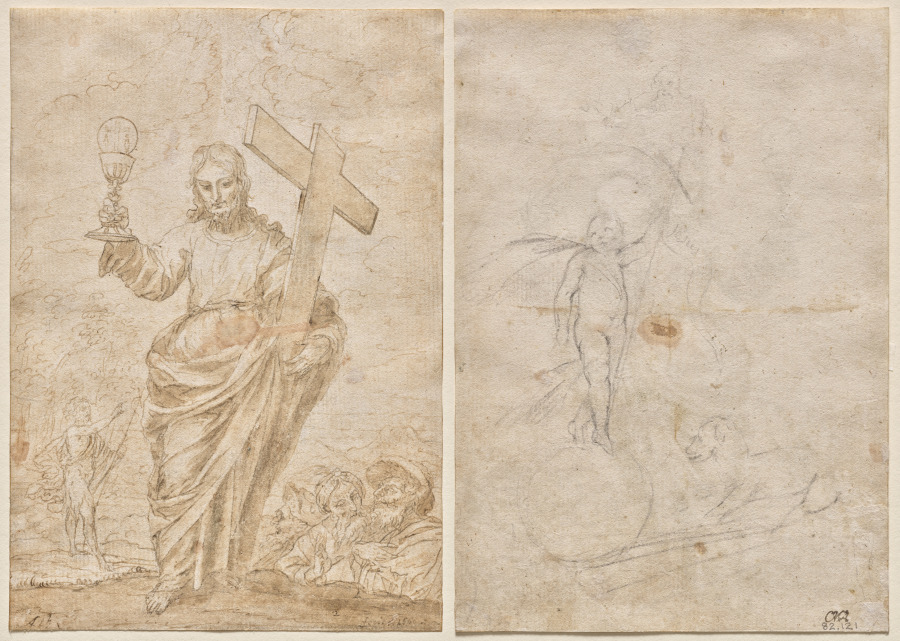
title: Christ Holding a Chalice and Cross (recto); Resurrected Christ and Lamb of God (verso)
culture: Spain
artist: Alonso Cano (Spanish, 1601–1667)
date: 1666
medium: pen and brown ink and brush and brown wash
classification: Drawing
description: In this drawing, a triumphant Christ holds the cross signifying his resurrection while offering a chalice as a symbol of his blood and sacrifice. In the background, Saint John the Baptist points, identifying Christ as the Lamb (or sacrifice) of God. Alonso Cano was an artist in Baroque Spain who made works primarily in the service of the Catholic Church and Spanish monarchs. Though no related painting is known, the composition is appropriate for an altarpiece, meant as a visual aid to clarify the meaning of the Catholic Mass.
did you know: The disk rising above the chalice in Christ's hand represents the eucharistic wafer. Designs were impressed onto these disks of unleavened bread using special wafer irons, some of which have made it into museum collections.